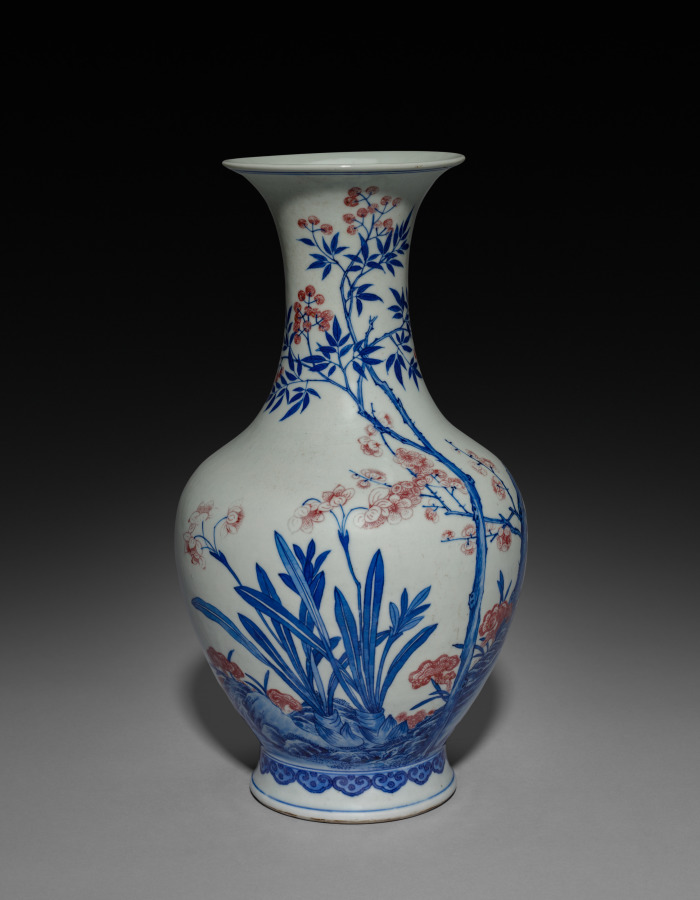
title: Vase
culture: China, Jiangxi province, Jingdezhen kilns, Qing dynasty (1644-1911), Yongzheng reign (1723-35)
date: 1723–35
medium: porcelain with underglaze blue and red decoration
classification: Ceramic